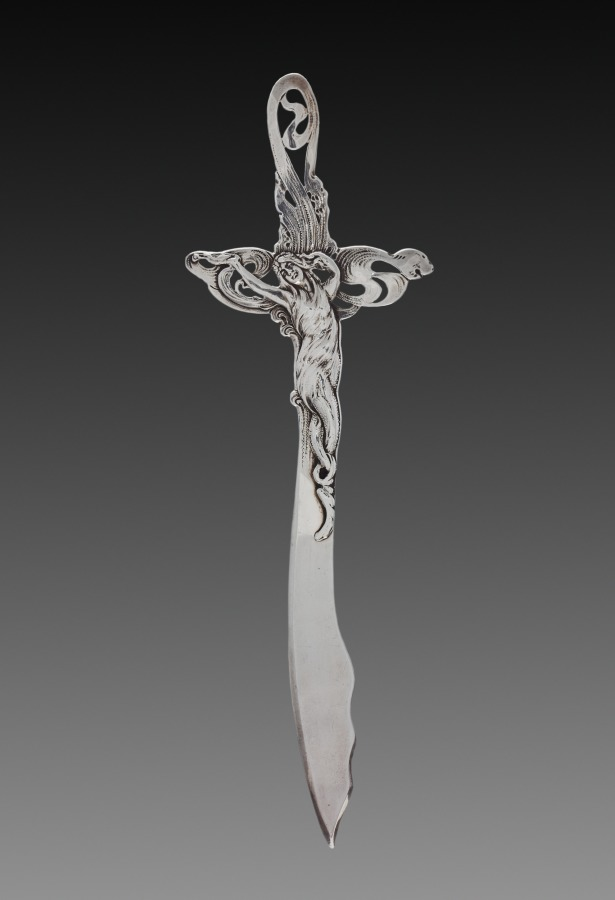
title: Paper Knife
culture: America, late 19th-early 20th century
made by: George W. Shiebler & Co. (American)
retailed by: Cowell and Hubbard Co. (American, Cleveland, 1879–1981)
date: c. 1900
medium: silver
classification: Metalwork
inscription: signed on reverse: 2045/Sterling/mark for Shiebler of wings flanking "S" in center for George Shiebler & Co., New York, New York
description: During the 1890s a new style emerged that reflected naturalistic and symbolic motifs found in Japanese and other Asian design. This movement rejected the historicism that had dominated architecture and design during the previous decades and took hold across Europe and America too. In France the style was known as "Art Nouveau," after the name of the gallery belonging to its chief proponent Siegfried Bing, the Maison de L'Art Nouveau (House of the New Art). This paper knife by the American silver company George W. Shiebler & Co. typifies Art Nouveau style with its flowing lines enveloping a young woman, revered as the ideal natural beauty. The composition resolves into a pointed dagger, suggesting a tragic end to life itself. Art Nouveau reached its apex at the 1900 world's fair in Paris, which was intended to herald the new century with a new style of art. However, critics and consumers alike soon rejected Art Nouveau as too sentimental in favor of newer motifs and styles as the moment passed. By 1905 it was all but forgotten.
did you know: This expressive Art Nouveau paper knife, or letter opener, was sold by the Cleveland jeweler Cowell and Hubbard around 1900.